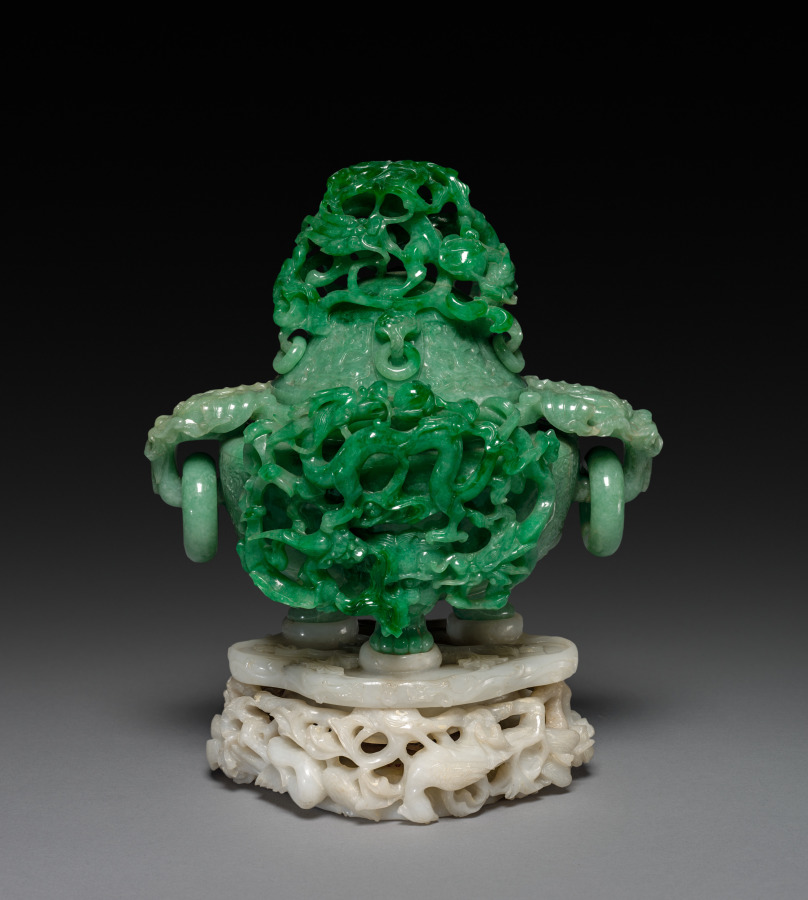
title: Three-Sectional Altar Group: Koro with Lid and Base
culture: China, Qing dynasty (1644-1911)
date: 1644–1911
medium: jade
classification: Jade